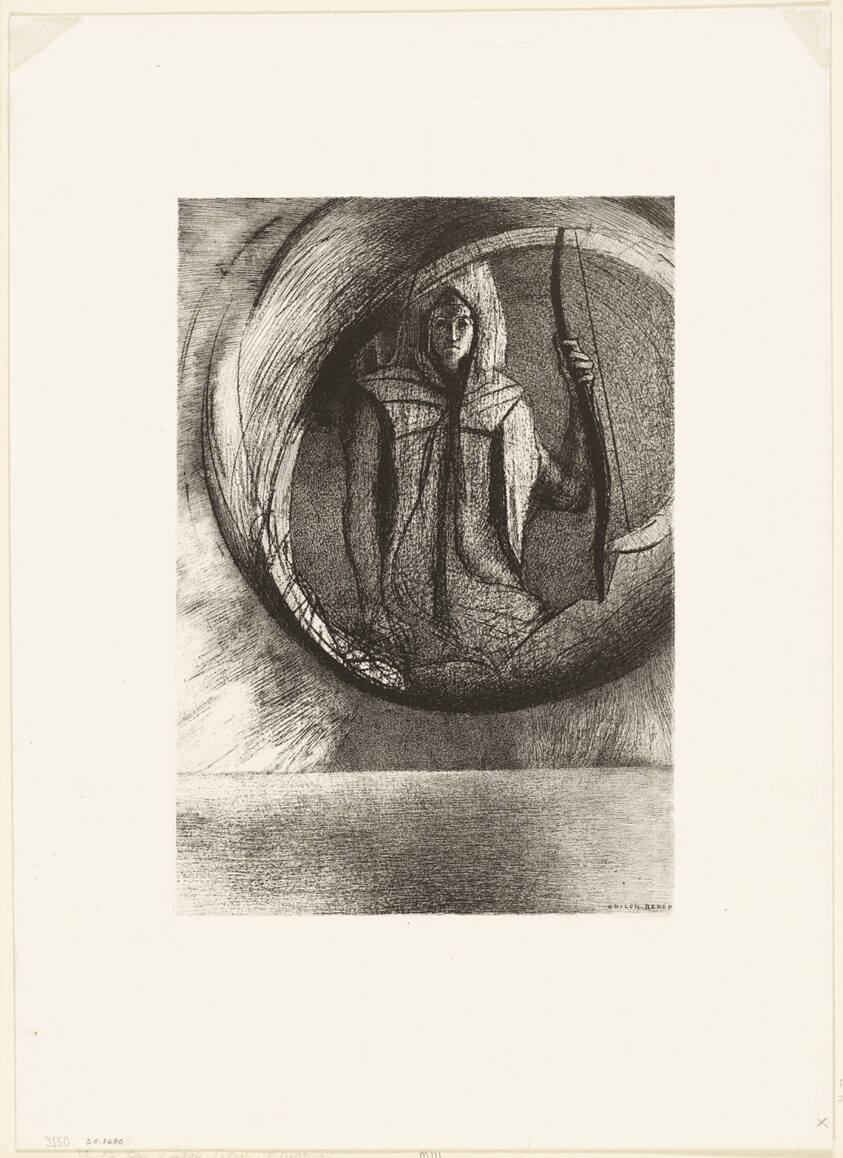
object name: Print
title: And Beyond, the Astral Idol, the Apotheosis, plate 2 of 6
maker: Odilon Redon (French, 1840-1916)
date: 1891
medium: Lithograph in black on ivory China paper laid down on off-white wove paper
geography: France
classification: lithograph; print; prints and drawing; paper